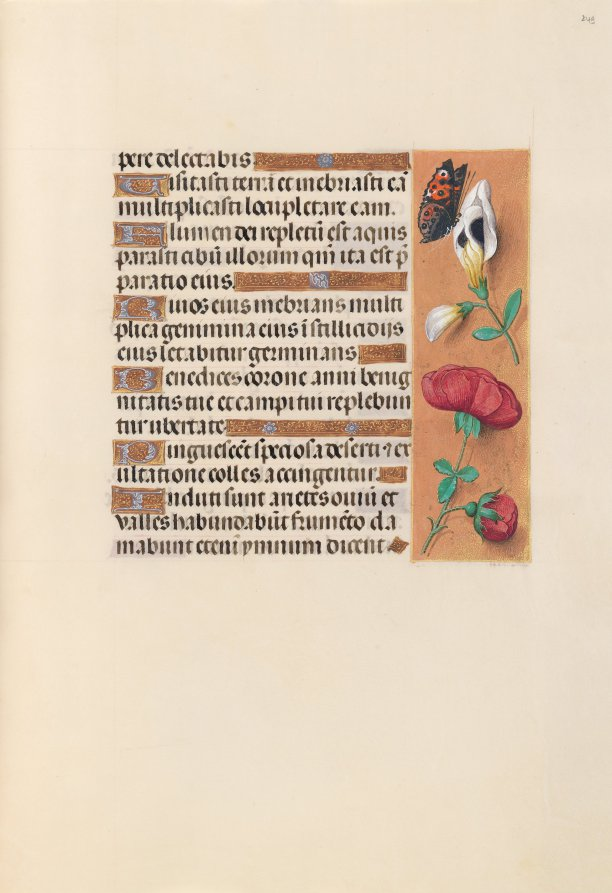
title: Hours of Queen Isabella the Catholic, Queen of Spain: Fol. 249r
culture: Flanders, Ghent and Bruges, late 15th century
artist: Master of the First Prayerbook of Maximillian (Flemish, c. 1444–1519)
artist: and Associates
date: c. 1500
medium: ink, tempera, and gold on vellum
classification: Bound Volume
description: This manuscript was illuminated by a circle of at least five highly organized manuscript painters active in the Flemish cities of Ghent and Bruges. The principal illuminator was Alexander Bening, who painted the majority of the book's miniatures. Manuscripts produced by this circle of artists are renowned for the decoration of their borders, which typically feature a rich variety of realistically-painted flowers, birds, and butterflies. This prayer book, called a book of hours, was intended not for a cleric, but for the private devotions of a lay person-in this case, Isabella the Catholic, Queen of Spain (1451-1504). Isabella's coat of arms embellishes the book's frontispiece. It is unlikely that the book was commissioned by the Queen herself; rather, she probably received it as a diplomatic gift from someone courting her patronage, perhaps Cardinal Francisco Jimenez de Cisneros. A Franciscan friar, Jimenez was dependent upon Isabella for his advancement, first to the post of Queen's confessor in 1492, and then to Archbishop of Toledo in 1495.